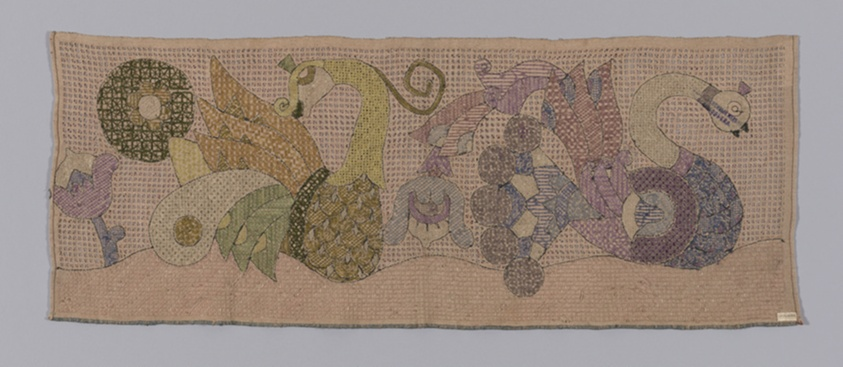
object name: Textile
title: Square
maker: Ukraine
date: 19th century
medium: Linen; drawn work and embroidered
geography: Ukraine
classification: needlework (visual works); weaving; textile